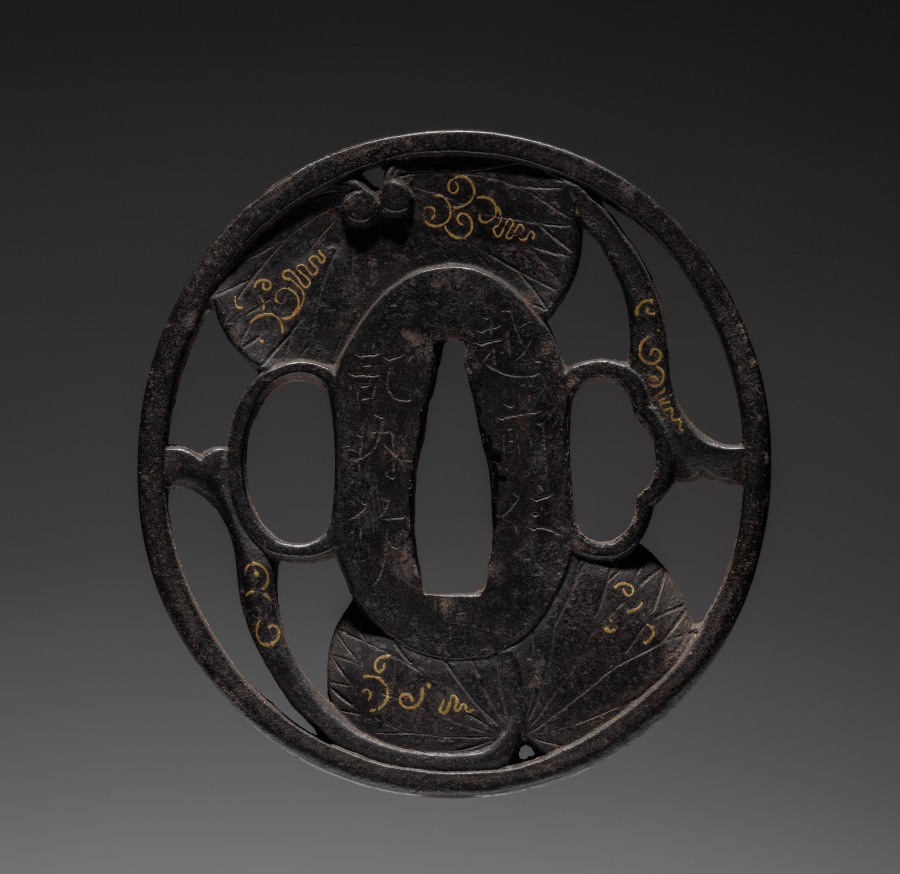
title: Sword Guard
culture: Japan, Edo period (1615–1868)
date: 1600s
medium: iron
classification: Arms and Armor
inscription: Signature: Kinai, residing in Echizen (province) made